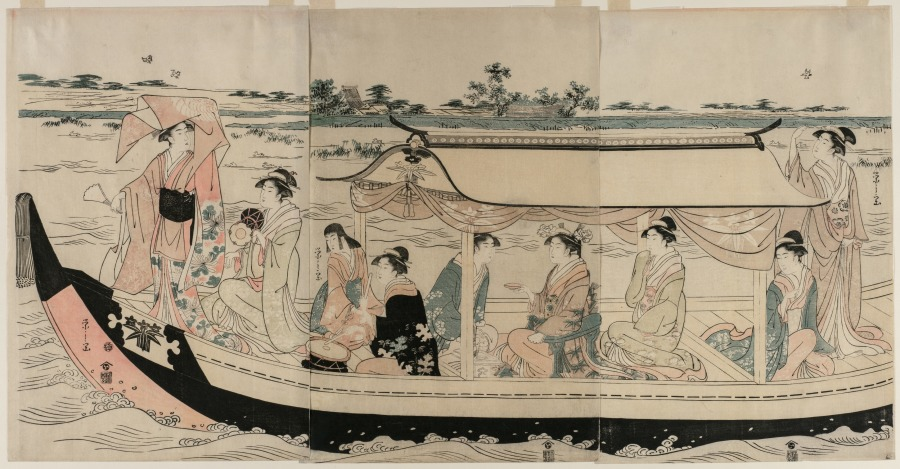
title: Women in a Pleasure Boat on the Sumida River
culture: Japan, Edo period (1615–1868)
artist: Chōbunsai Eishi (Japanese, 1756–1829)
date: early 1790s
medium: triptych of woodblock prints; ink and color on paper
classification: Print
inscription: Signature: Eishi ga Seal: Nishimuraya Yohachi (Eiju han, emblem).